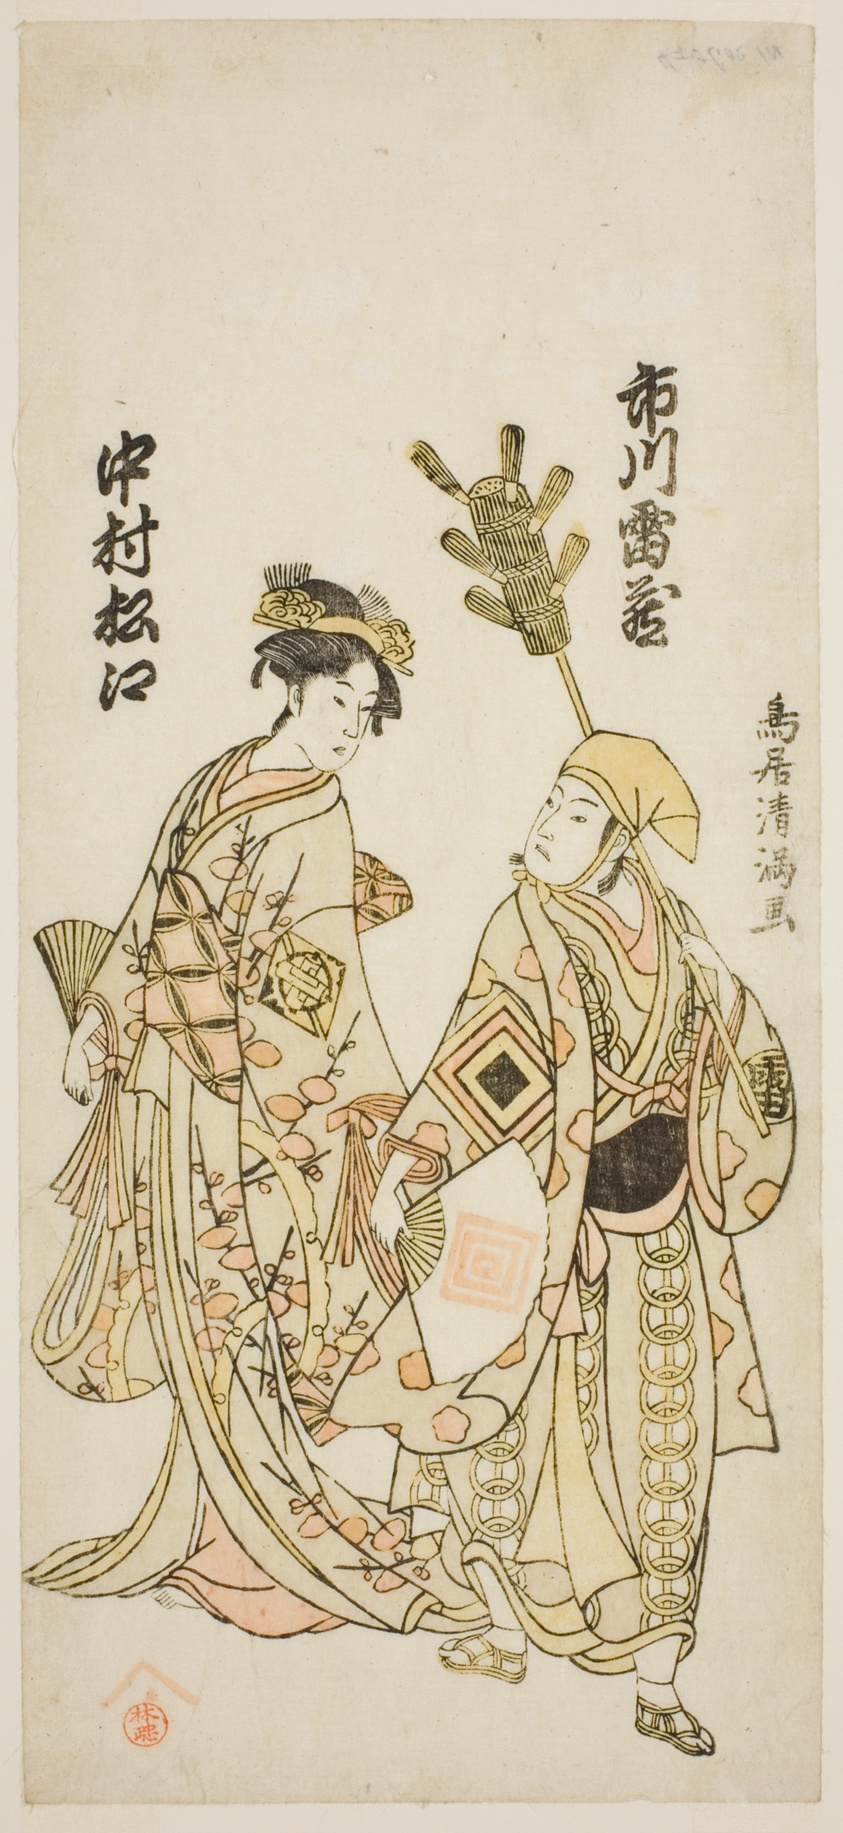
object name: Print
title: The Actors Ichikawa Raizo I as a peddler of tea whisks and Nakamura Matsue I as Yuya Gozen in the play "Daijobu Takadate Jikki," performed at the Nakamura Theater in the eleventh month, 1763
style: Japanese (culture or style)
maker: Torii Kiyomitsu I (Japanese, 1735–1785)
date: 1763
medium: Color woodblock print; hosoban, benizuri-e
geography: Japan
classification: woodblock print; print; asian art